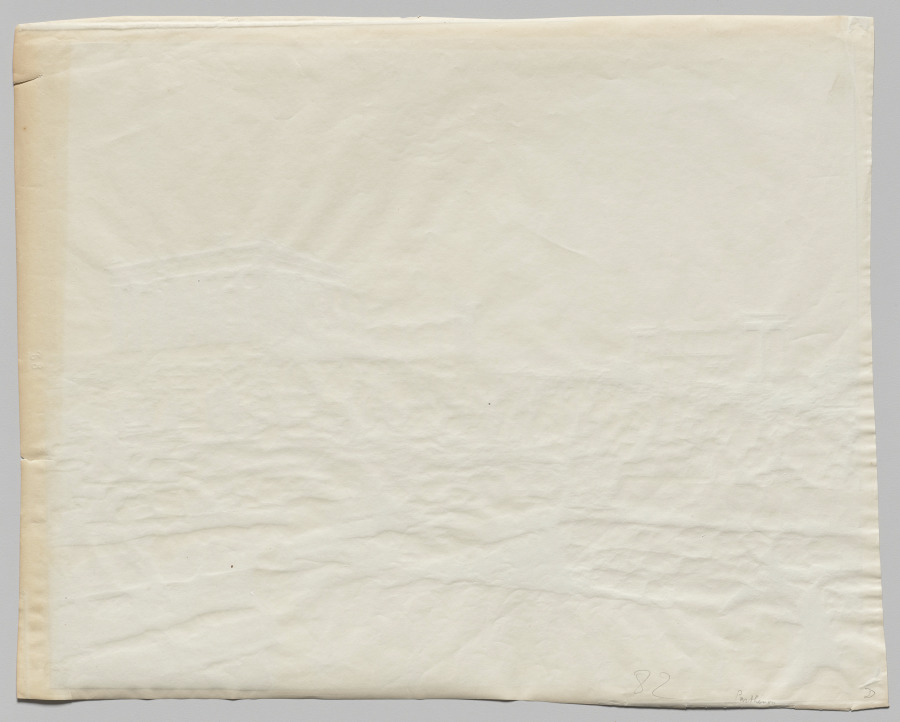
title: View of the Parthenon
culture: France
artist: Adolphe Braun & Co. (French, 1845–1894)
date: c. 1880s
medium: mammoth carbon print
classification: Photograph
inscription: Number imprinted on recto, right margin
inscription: Written in pencil on verso: "82"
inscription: Written in pencil on verso: "Parthénon"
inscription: Written in pencil on verso: "D"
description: Adolphe marketed his photos of flowers, artworks, landscapes, and monuments from across Europe throughout that continent and in North America. The Acropolis of Athens, the most famous ancient Greek site, must have sold well; Braun offered multiple views of it. The image on a carbon print is formed from pigmented gelatin, which is far more resistant to fading than the silver or metal salts in silver-based prints.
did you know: Carbon prints are among the stable and long-lasting photographic processes.